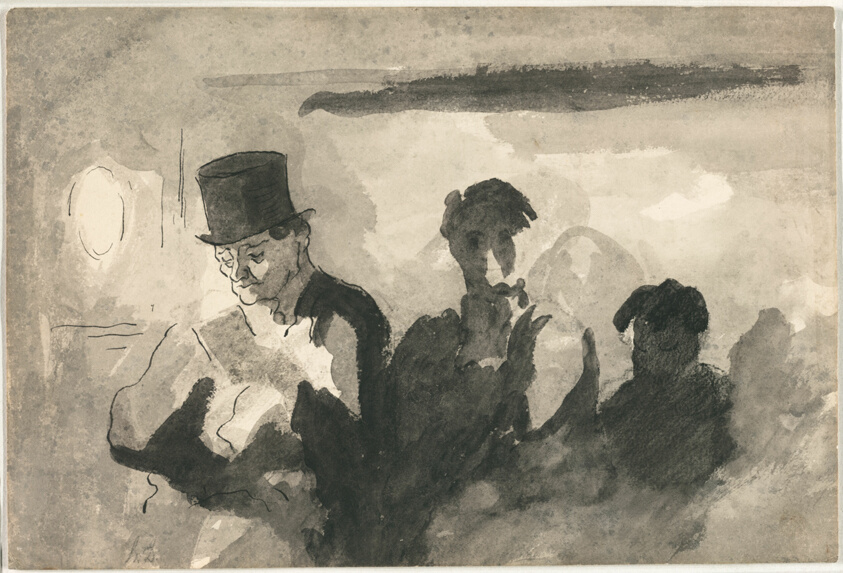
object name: Drawing and Watercolor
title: Third Class Carriage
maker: Honoré Victorin Daumier; French, 1808-1879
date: 1864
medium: Brush and black ink and gray wash, black chalk and black chalk wash, with spattered gray gouache, pen and black ink, on cream wove paper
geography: France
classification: prints and drawing; chalk; wash; ink; drawings (visual works)